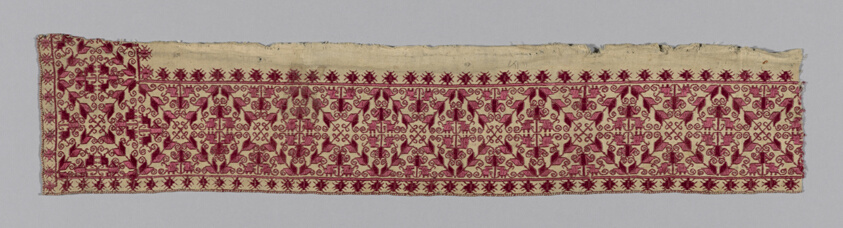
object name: Textile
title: Border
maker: Italy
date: Early 17th century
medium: Linen, plain weave; embroidered with silk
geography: Italy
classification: textile; needlework (visual works)